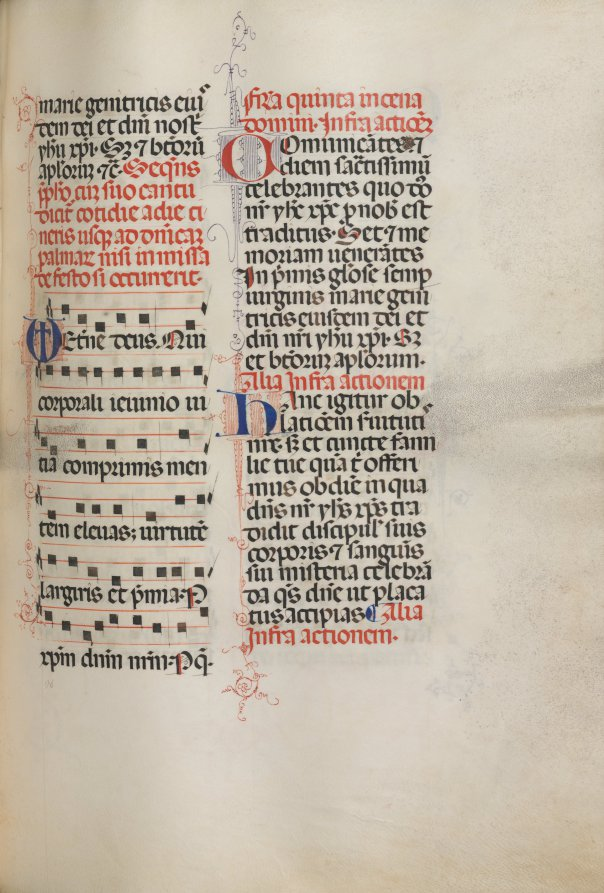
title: Missale: Fol. 178: Music for various ordinary prayers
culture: Italy, Perugia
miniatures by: Bartolommeo Caporali (Italian, c. 1420–1503)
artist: assisted by Giapeco Caporali (Italian, d. 1478)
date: 1469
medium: ink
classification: Bound Volume